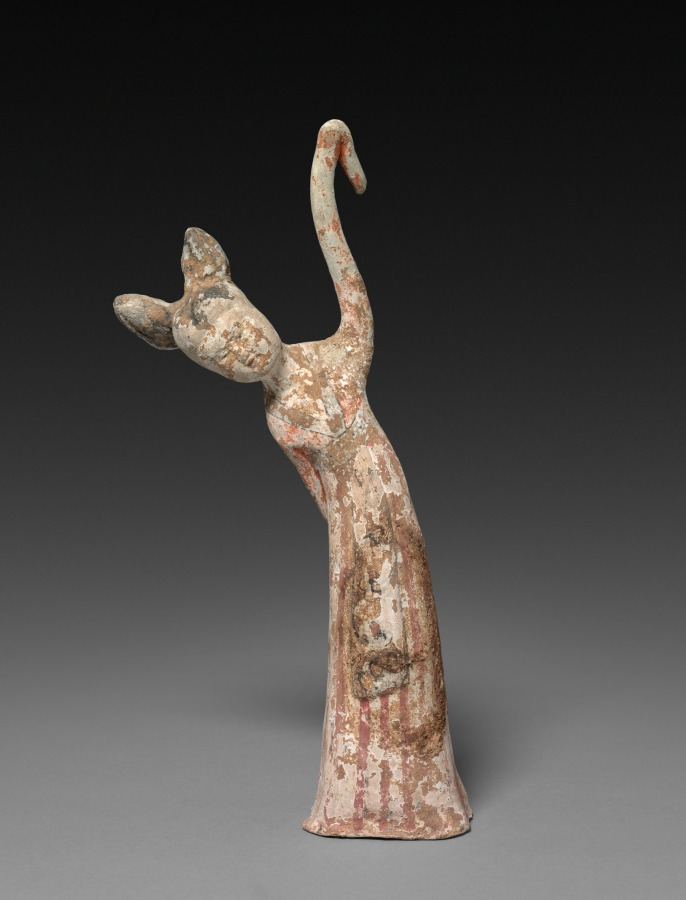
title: Female Dancer: Tomb Figurine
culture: China, Tang dynasty (618-907)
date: 650–700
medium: earthenware with polychromy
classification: Sculpture